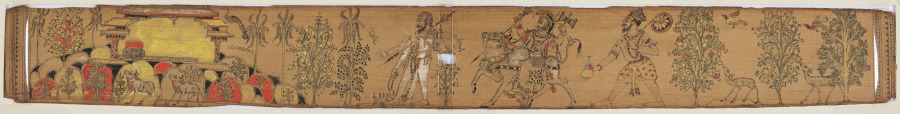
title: Shiva and His Followers Return to Mount Kailash (verso), from a Romance of Chandrabhanu and Lavanyavati of Upendra Bhanja (1670–1740)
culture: Eastern India, Odisha (formerly Orissa)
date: 1700s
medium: gum tempera and lampblack on palm leaf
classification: Painting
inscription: kailasakandara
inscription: 1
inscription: e pancagni gartta acchi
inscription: e rajāpua tapasā kari/ sivapūjā kari acchi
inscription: agni jalum accchi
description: At left is a multicolored mountain, labeled by an inscription in the local language of Oriya as a “cave on Kailash,” the Himalayan abode of the god Shiva and his wife Parvati. The cave with its bed and bolsters is empty, but the god is returning home on his bull, Nandi. The wilderness is indicated by the variety of trees, birds, and spotted deer. This illustrated leaf is from a book that would have been stacked and bound by a string through the hole in the center. The lines were etched with a stylus into the palm leaf. Black soot from butter lamps was rubbed over the page and wiped off, leaving only the grooves black. Afterward, artists added color using a brush.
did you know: There is a three-legged yogi.